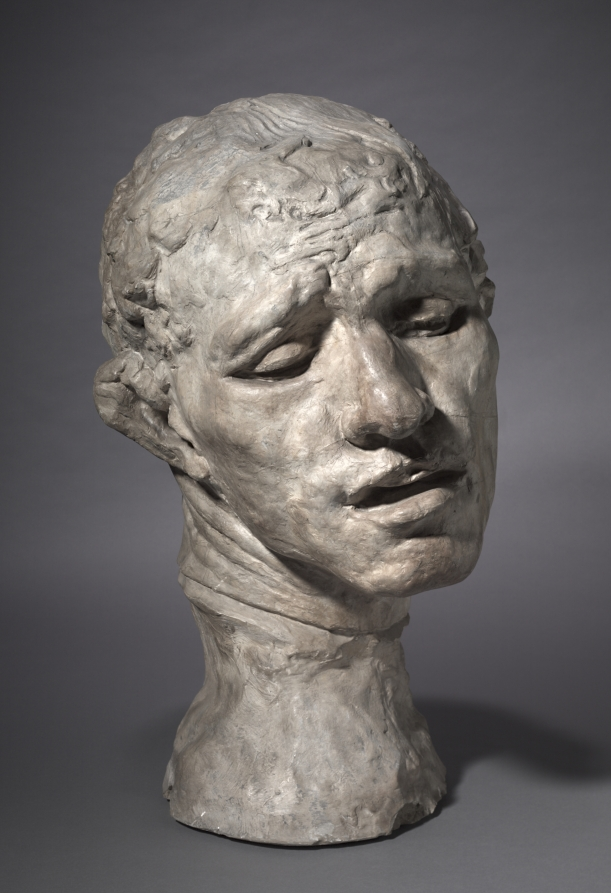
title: Heroic Head of Pierre de Wissant, One of the Burghers of Calais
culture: France, late 19th-early 20th Century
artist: Auguste Rodin (French, 1840–1917)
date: 1886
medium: plaster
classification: Sculpture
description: This sculpture depicts one of the figures in Rodin’s large public monument The Burghers of Calais (1884–89), featuring six French men who volunteered to be taken prisoner by the English in exchange for lifting the siege of Calais during the Hundred Years War (1337–1453). Pierre de Wissant’s anguished expression suggests extreme mental suffering as he contemplates his expected execution. Rodin exhibited a life-size version of the figure as an independent work before completing the monument. He later made multiple versions in various sizes and media. This plaster features a highly expressive, hand-worked surface inscribed in places with graphite and covered with delicate, tinted washes.